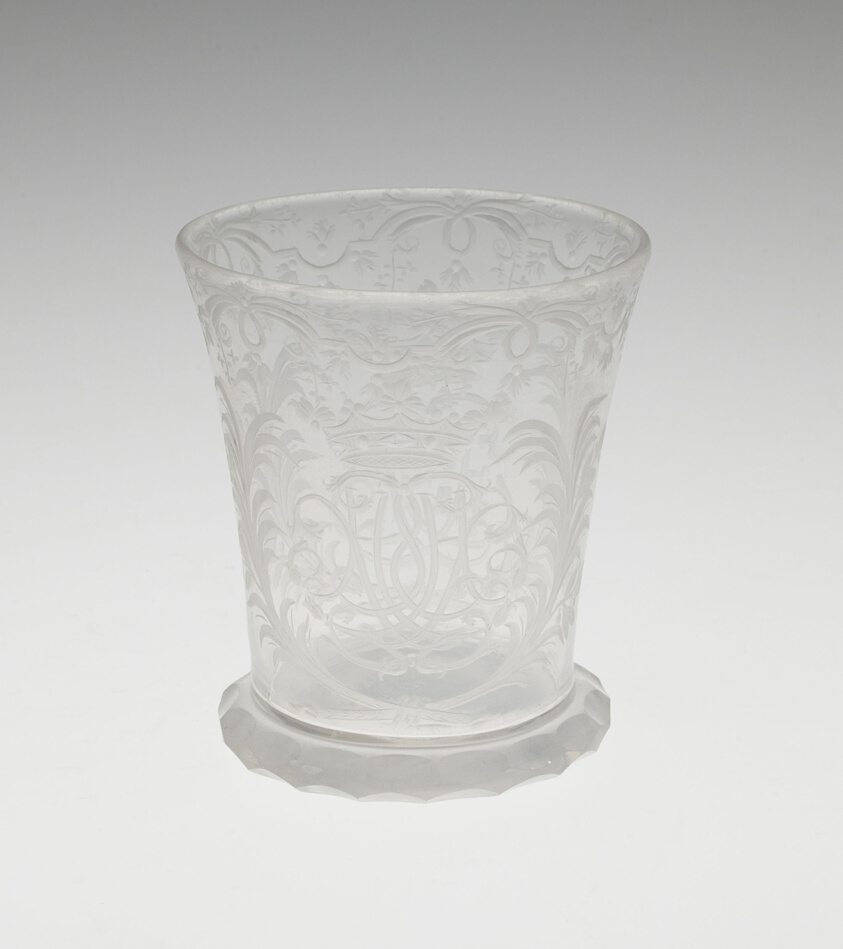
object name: Glass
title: Beaker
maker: Bohemia, Czech Republic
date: Early 18th century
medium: Glass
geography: Bohemia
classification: glass; european decorative arts